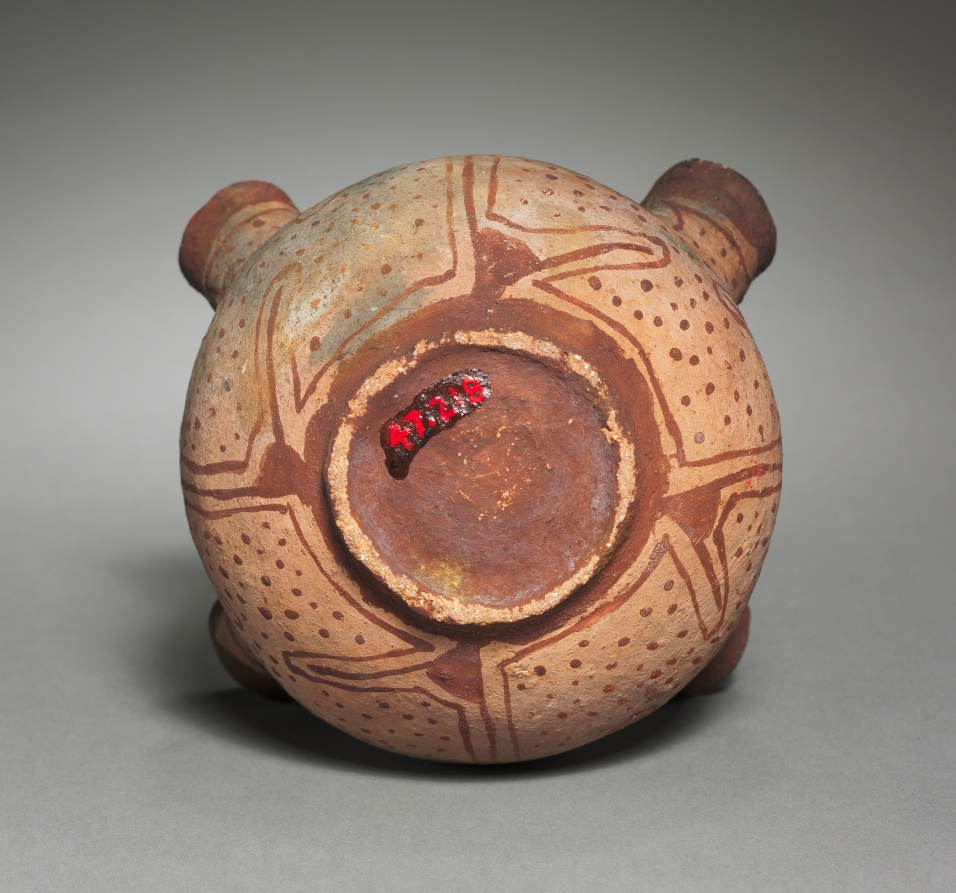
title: Vessel with Four Spouts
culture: Great Basin, Pueblo, Mojave, Post-Contact Period, early 19th century?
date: early 1800s?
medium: ceramic, pigment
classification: Ceramic